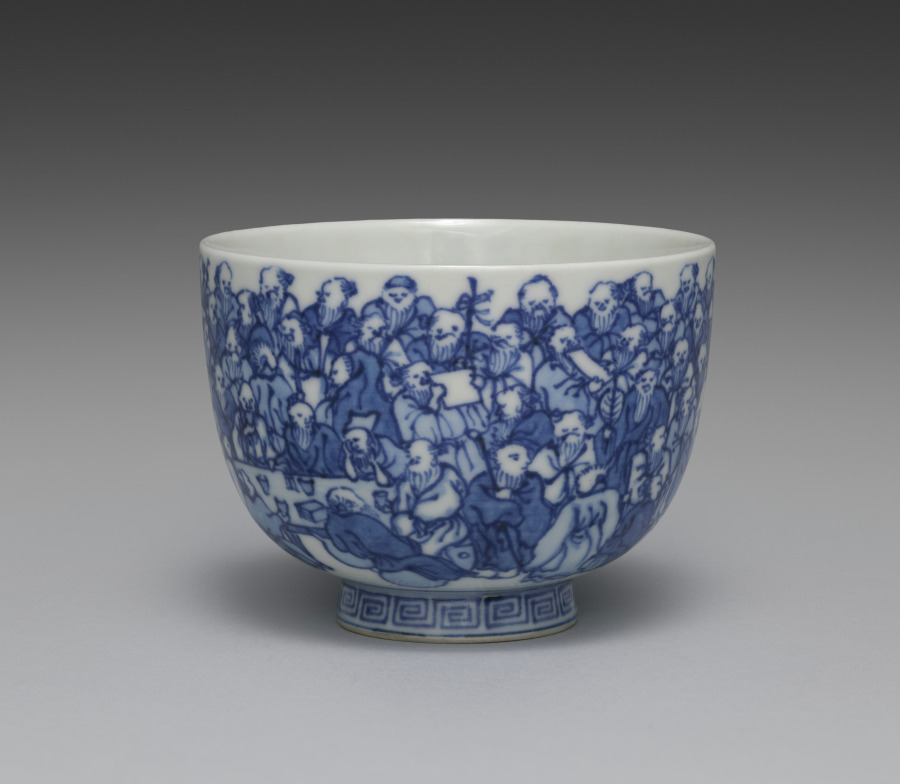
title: Teacup from Teacups with a Hundred Sages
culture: Japan, Meiji period (1868–1912)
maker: Seifū Yohei III (Japanese, 1851–1914)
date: 1893–1914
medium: One from a set of five teacups; porcelain with underglaze blue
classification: Ceramic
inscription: 清風造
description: Each of these five teacups has a painting of identical design in underglaze blue, but as the tiny figures are drawn entirely by hand, each cup has its own personality. The theme of the sencha cups is an assembly of sages or immortals, literally “a hundred venerable [people]” (hyakurō). The myriad figures crowd the scene in groups. The god of longevity, with his tall forehead, sits with his cranes, having flown in from Mt. Penglai on the Isle of the Immortals. Seven long-bearded sages sit around a stone table, chatting and drinking; one is seated on an enormous gourd. Of course, there is a stack of books on the table, and elsewhere, scrolls are being written upon or read—in one case held very close by a sage who is wearing glasses. The design was enormously popular in ceramics made for those engaged in literati culture.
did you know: Seifū Yohei III (1851–1914) produced many works for tea gatherings where people drank Chinese-style leaf-tea (sencha).